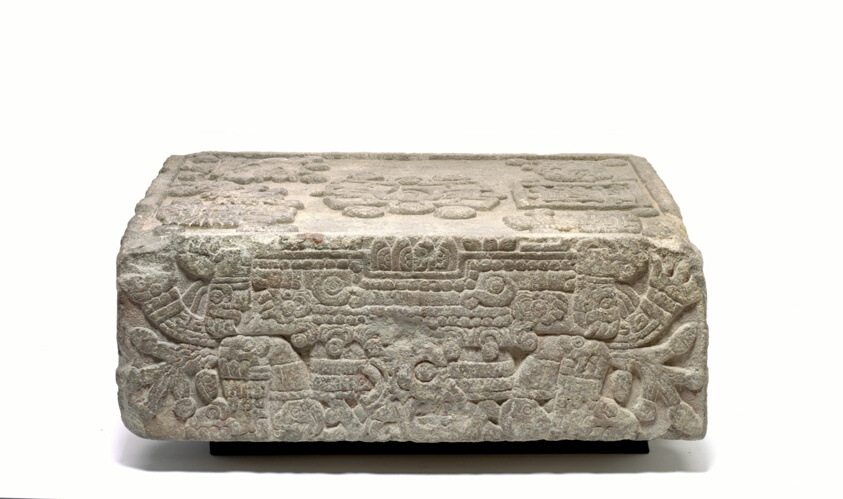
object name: Sculpture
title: Coronation Stone of Motecuhzoma II (Stone of the Five Suns)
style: aztec, mesoamerican, Pre-Columbian, americas, Arts of the Americas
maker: Aztec (Mexica) (Tenochtitlan, Mexico)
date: 1503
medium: Basalt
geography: Tenochtitlan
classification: ceremonial object; stone; art of the americas; sculpture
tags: architecture, history, coronations, animals, record of events, Hieroglyphs, Mexico, Aztecs, mythology, kingship, rulers (people), goddesses